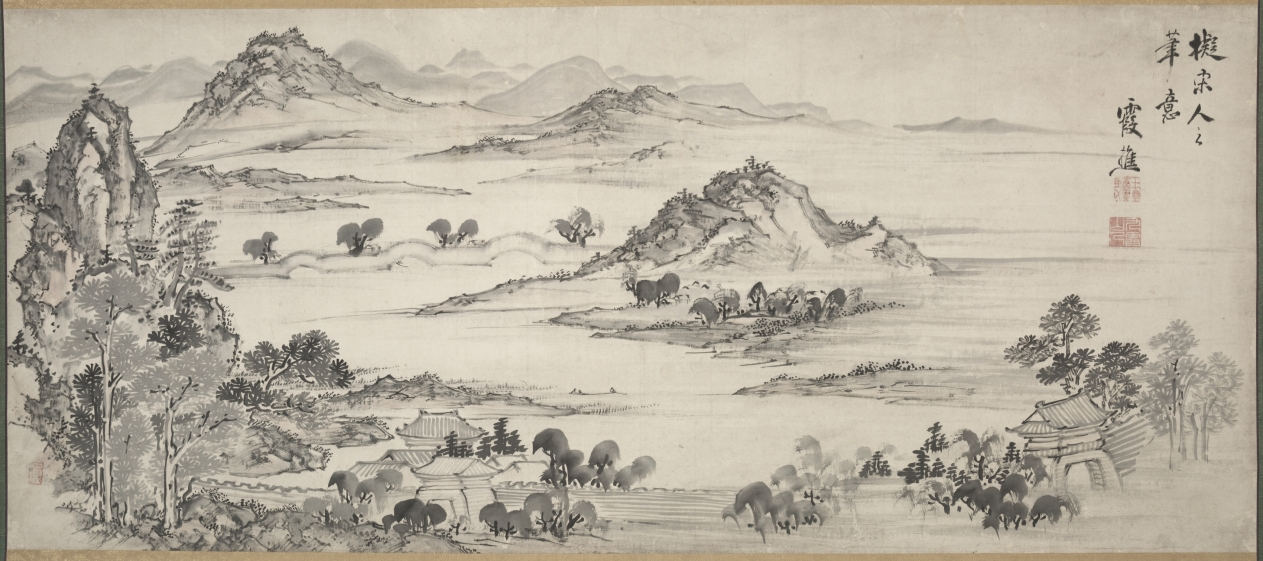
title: West Lake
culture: Japan, Edo period (1615–1868)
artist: Ike Taiga (Japanese, 1723–1776)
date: mid-1700s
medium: Hanging scroll; ink and light color on paper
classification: Painting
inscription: upper right: inscription and signature, two seals of artist.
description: West Lake near Hangzhou, China, has been home to revered poets who immortalized it in their poetry. Tang dynasty poet Bai Juyi (772–846) lived in its vicinity, and Song dynasty poet Lin Bu (967–1028) led a reclusive life on Solitary Hill near the lake. Landscape paintings of West Lake gained in popularity in Japan as early as the 1400s. The distinctive, arched bridges connecting small islands in the lake identify the subject. Ike Taiga was among the first generation of Japanese artists to emulate Chinese scholars who painted as amateurs and gifted their work to friends and colleagues.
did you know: Among Taiga's sources for his paintings were images he studied in Chinese wood-block–printed books.